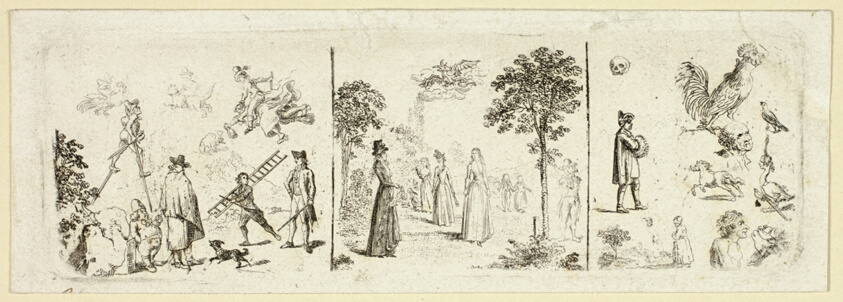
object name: Print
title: Various Sketches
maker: Daniel Nikolaus Chodowiecki (German, 1726-1801)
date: 1800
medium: Etching on paper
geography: Germany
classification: etching; print; prints and drawing